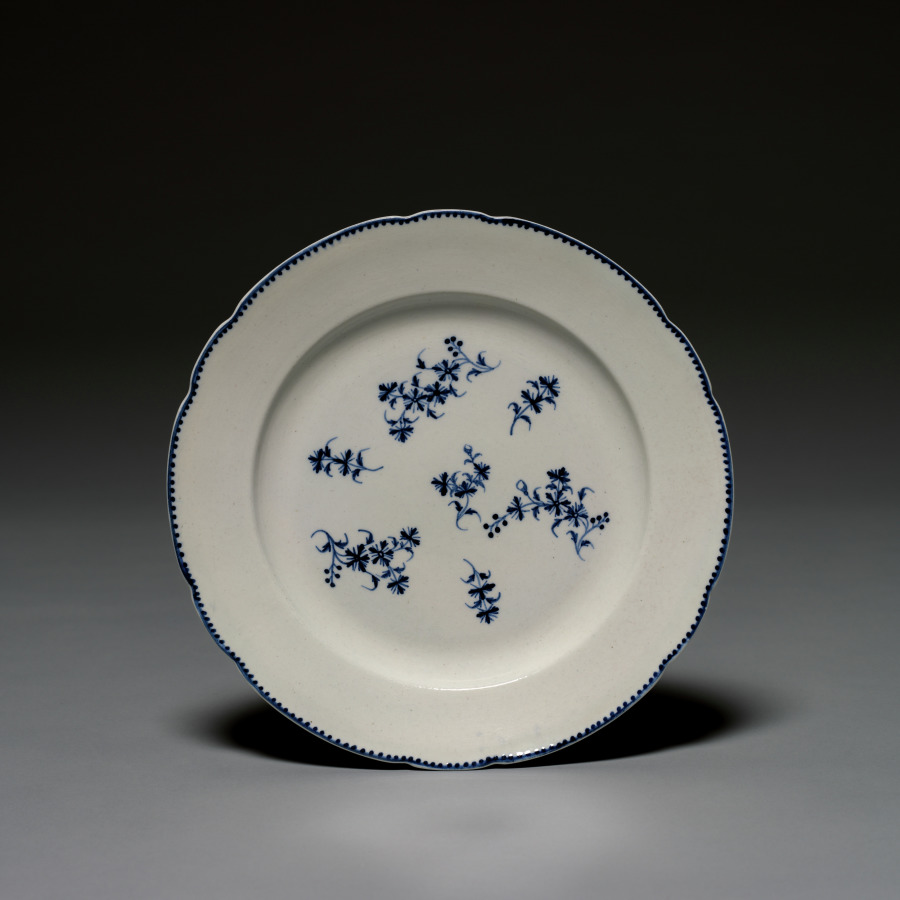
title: Plate (Assiette)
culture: France, 18th century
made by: Arras Porcelain Factory (French)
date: c. 1775–90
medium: soft-paste porcelain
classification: Ceramic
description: The porcelain factory of Arras was founded in 1770 with the financial backing of the County of Artois. This plate, with its striking cobalt blue on a milky-white ground, was typical of its short-lived 20 years in porcelain production. The sprigs of stylized cornflowers that decorate the center of this plate, a motif known in France as barbeaux, were popularly reproduced on porcelain during the last quarter of the 1700s.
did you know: The barbeaux pattern was notably used by the Chantilly porcelain factory in the 1770s and was generally produced in either blue or green.